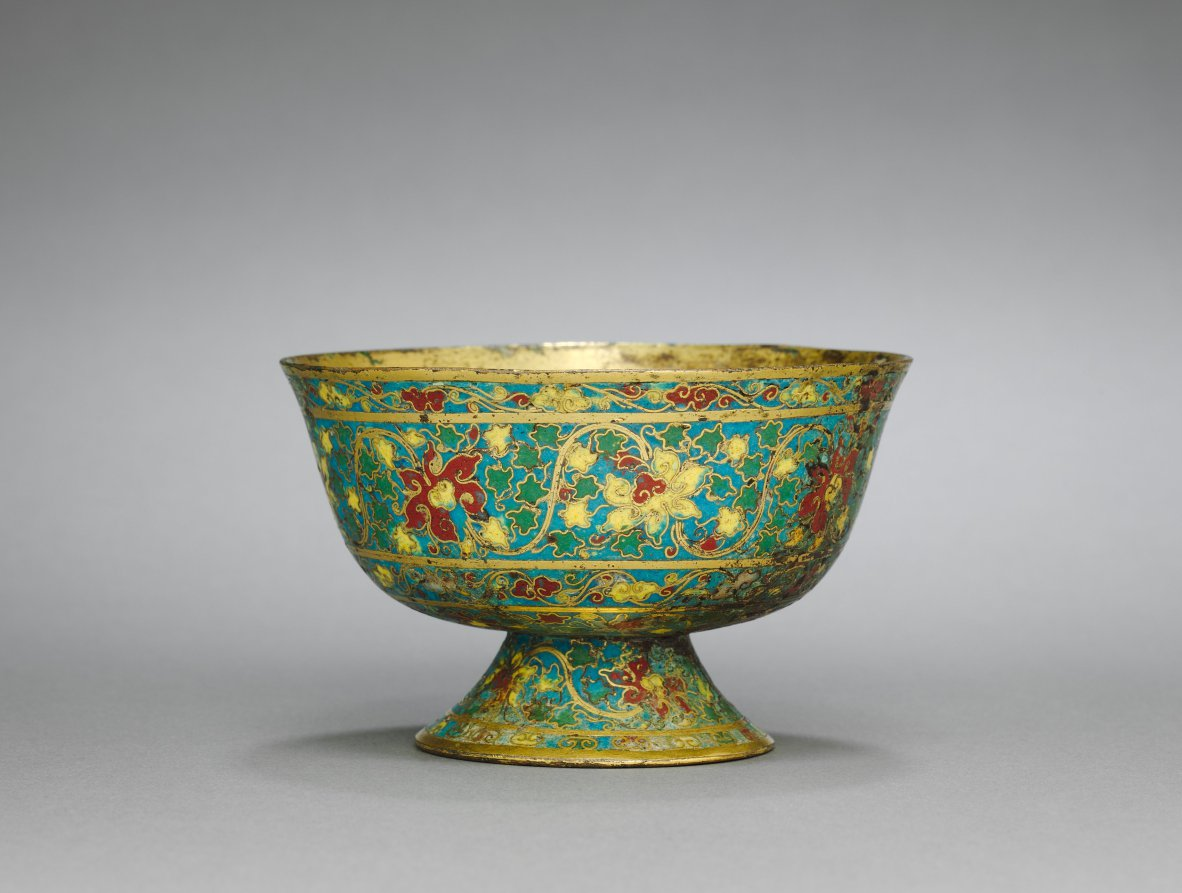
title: Bowl with Splayed Foot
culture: China, Qing dynasty (1644-1911)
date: 1700s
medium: cloisonné enamel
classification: Enamel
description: In cloisonné enameling, the decorative patterns are outlined by soldering metal wires (usually copper) to a metal base, creating a network of cells, or cloisons, to be filled with powdered enamels. After firing, the enamels are polished to create a smooth surface level with the cloisons. The exposed metal surfaces are gilt.